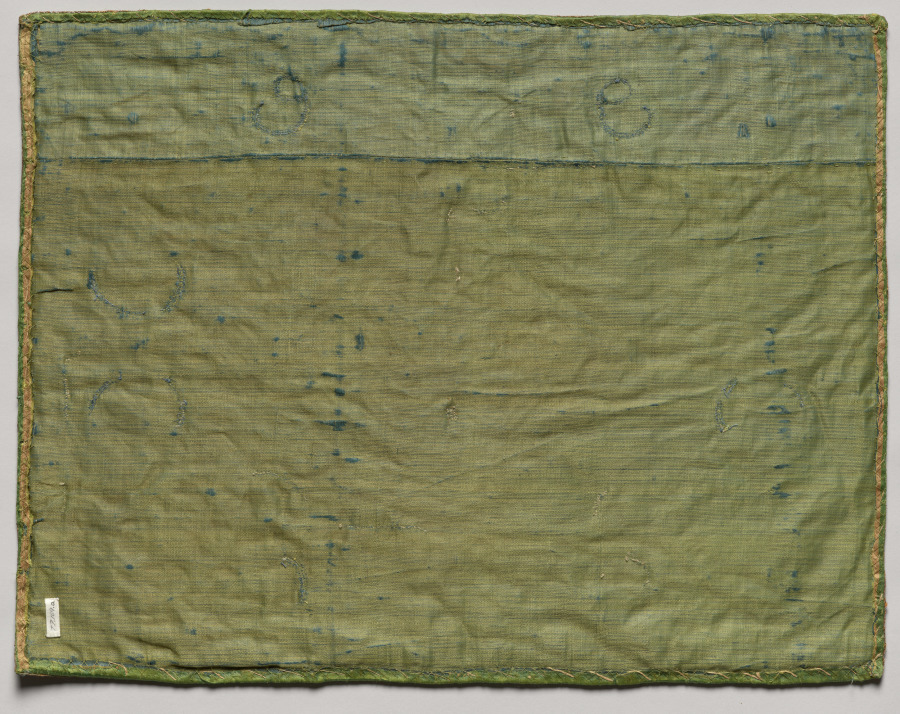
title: Apparel from a Dalmatic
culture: Italy, early 16th century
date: early 1500s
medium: embroidery; silk and metallic threads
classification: Embroidery